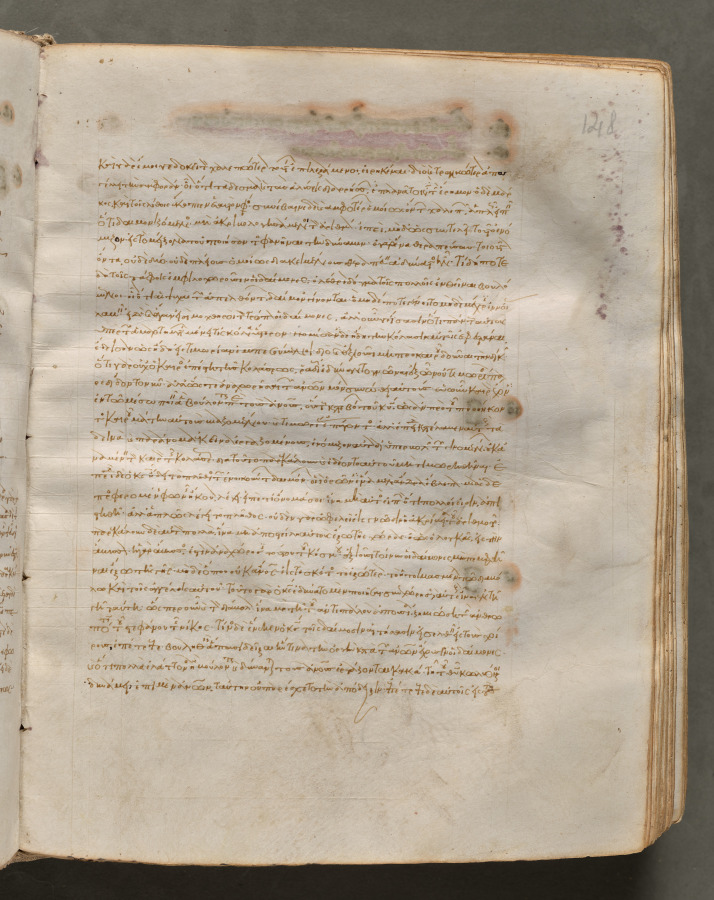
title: Text, folio 148 (recto), from a Gospel Book with Commentaries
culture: Byzantium, Constantinople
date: c. 1000–1100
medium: ink, tempera, and gold on vellum; leather binding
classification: Bound Volume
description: Each of the four gospels in this book opens on a page with brilliantly illuminated borders depicting the author of the text as well as birds-principally peacocks, symbols of the immortality of the soul-and fountains, representing the fountain of life and the salvation of the soul. This volume consists of 428 leaves with texts in Greek. Its level of sophistication suggests that it was probably written and decorated in a monastery in Constantinople.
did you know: Gospel Books were carried in procession through Byzantine churches.